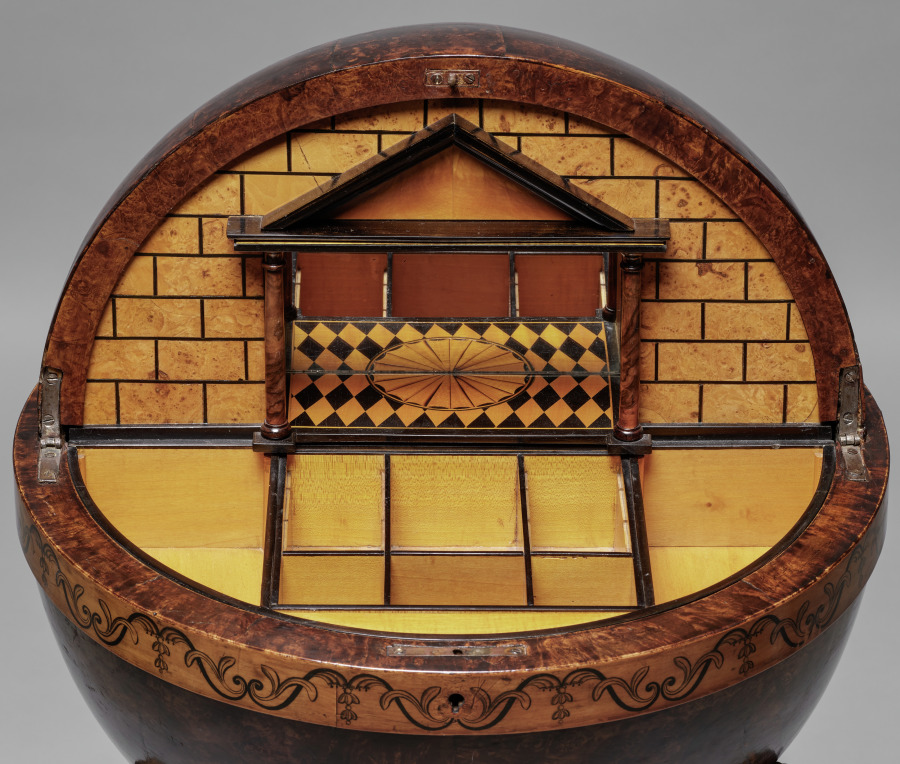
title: Globe Work Table (Globustisch)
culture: Austria, Vienna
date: c. 1810–15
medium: Burl walnut veneer, mahogany, ebony, satinwood, gilt wood, painted wood; mirrored glass; metal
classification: Furniture and woodwork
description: Work tables resembling globes were the usual form for a lady's sewing or writing table around 1800 in Austria. Combining moving parts, secret compartments, and highly finished decoration, these tables were also a way for the cabinetmaker to show off his skill. The tripod supports and temple-like architectural quality of both the exterior and interior decoration reflect the fashionable taste for neoclassical style, or Biedermeier as it was called in Austria, where Vienna was the center of such elaborate furniture production.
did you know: The top half of the globe rotates upward to reveal hidden compartments for sewing tools, threads, and unfinished fabric pieces.